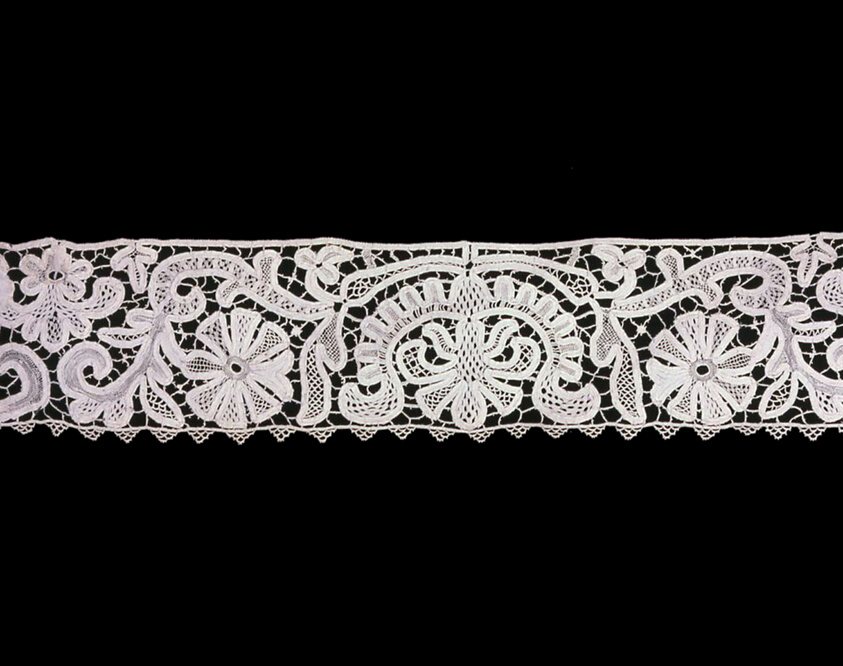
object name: Textile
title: Border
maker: Northern Europe, possibly Flanders, Northern Germany, or England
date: 1625/75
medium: Linen, needle lace with woven tapes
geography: Northern Europe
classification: textile; lace - mixed